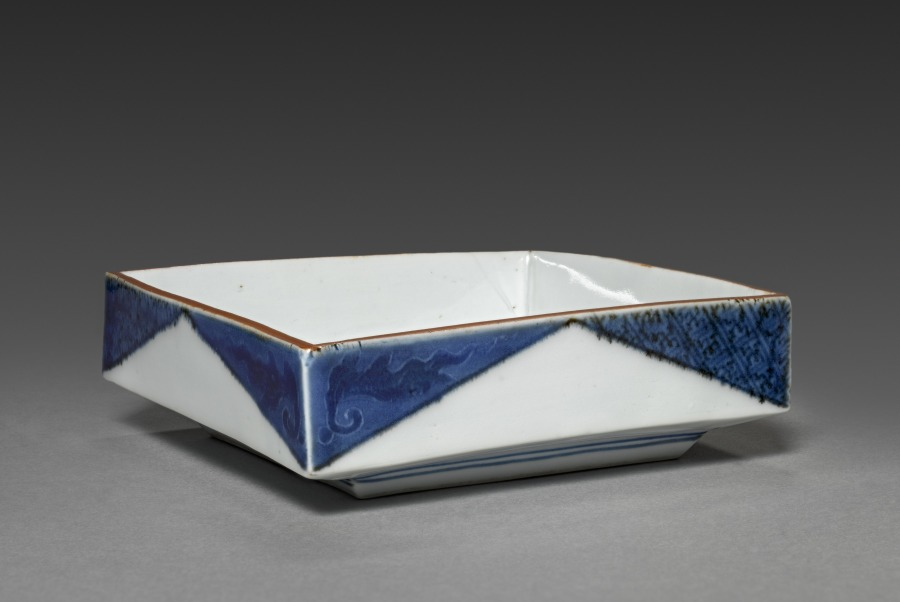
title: Side-Dish with Dandelion in Rocks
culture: Japan, Edo period (1615–1868)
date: 1700s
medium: One of a set of five dishes; porcelain with underglaze blue and overglaze iron oxide (Arita ware, Kutani style)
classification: Ceramic